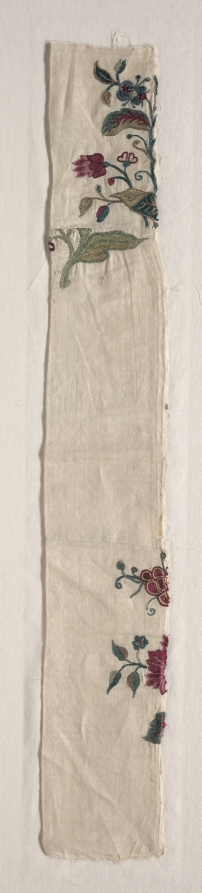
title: Embroidered Cover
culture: France, 18th century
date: 1700s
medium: embroidery, silk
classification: Embroidery